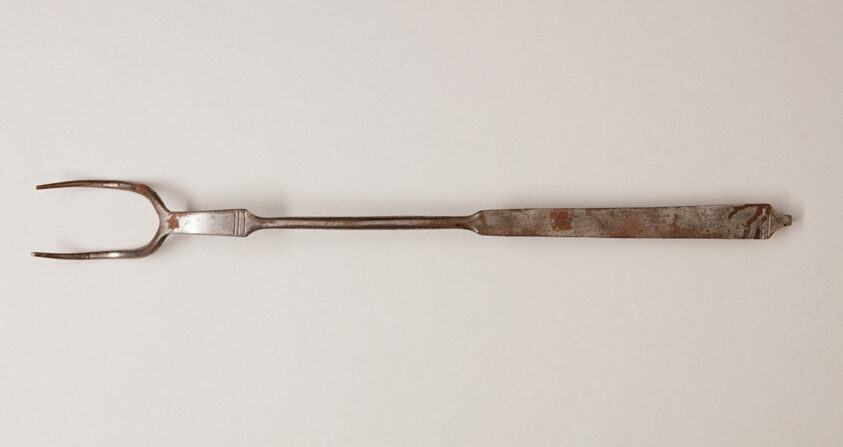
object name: Decorative Arts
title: Fork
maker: Artist unknown (American, 19th century)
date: 1800–50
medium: Wrought iron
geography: United States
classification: metalwork; american decorative arts; american arts; decorative arts